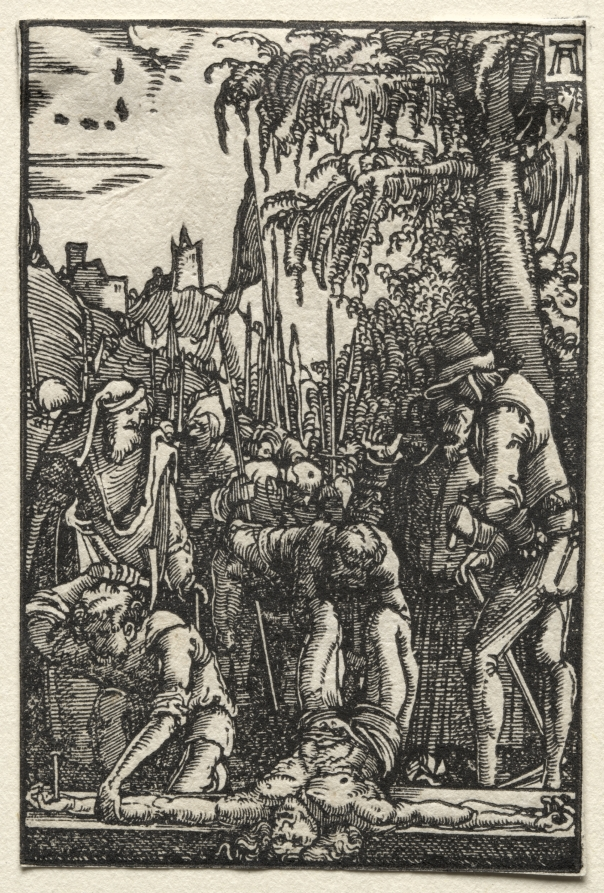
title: The Fall and Redemption of Man: Christ Nailed to the Cross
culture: Germany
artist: Albrecht Altdorfer (German, c. 1480–1538)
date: c. 1515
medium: woodcut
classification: Print